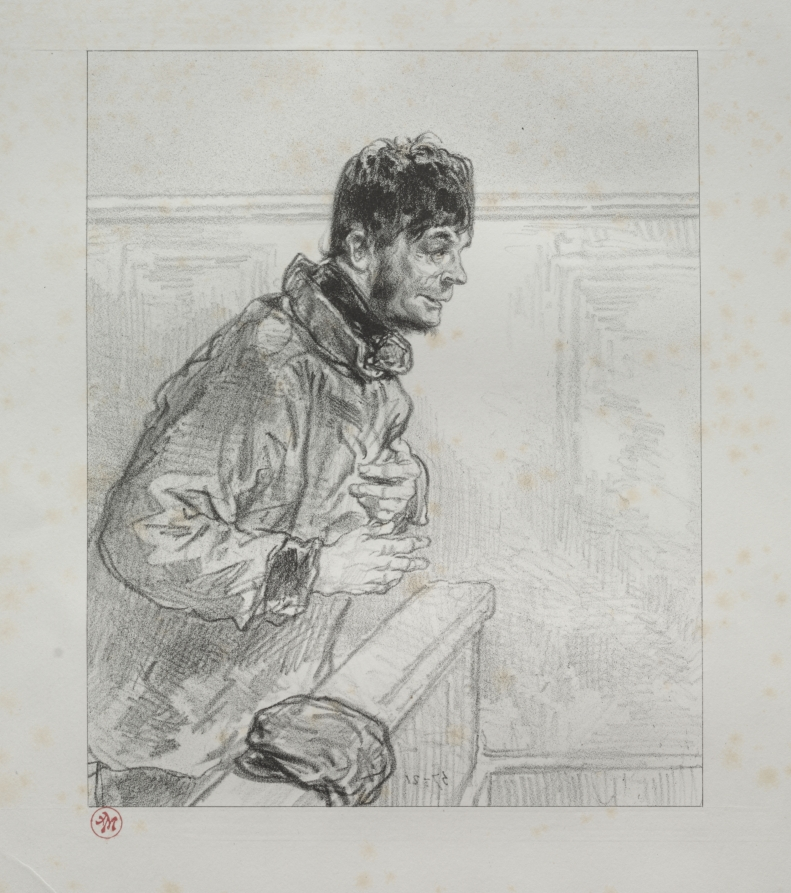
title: I should like to remark to M. Le Président that I have been made to play a part unworthy of a gallant man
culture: France, 19th century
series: Par-ci, par-lá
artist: Paul Gavarni (French, 1804–1866)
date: c. 1857–58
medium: lithograph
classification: Print